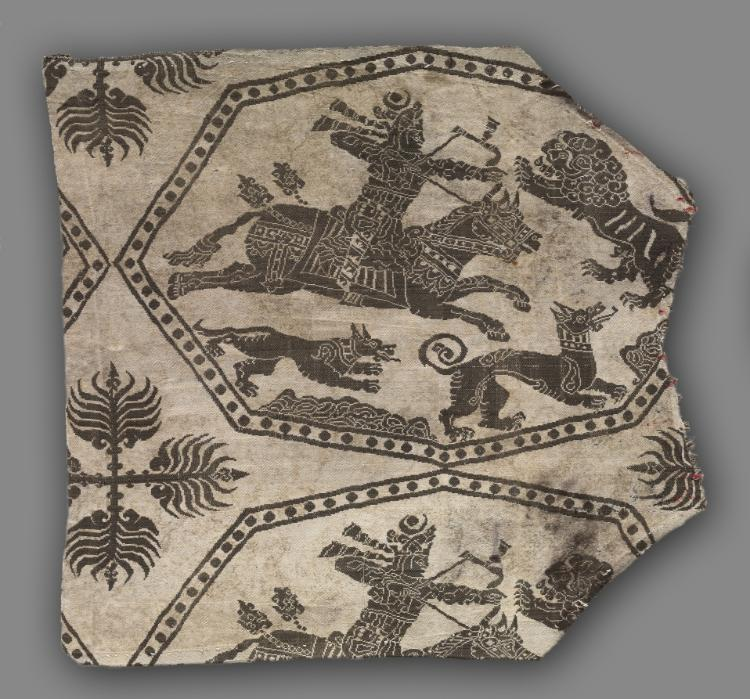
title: Fragment of a Caftan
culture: Iraq or Iran, in the style of the Buyid period (945–1055)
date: before 1982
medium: Silk: lampas weave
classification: Textile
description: This fragment from a caftan features large-scale flattened octagons with pearled borders that contain a royal hunting scene: a king mounted on a running horse draws his bow at a rampant lion. Two dogs with their tongues out also run towards the lion. The star-shaped interspaces are filled with four radiating palmettes.